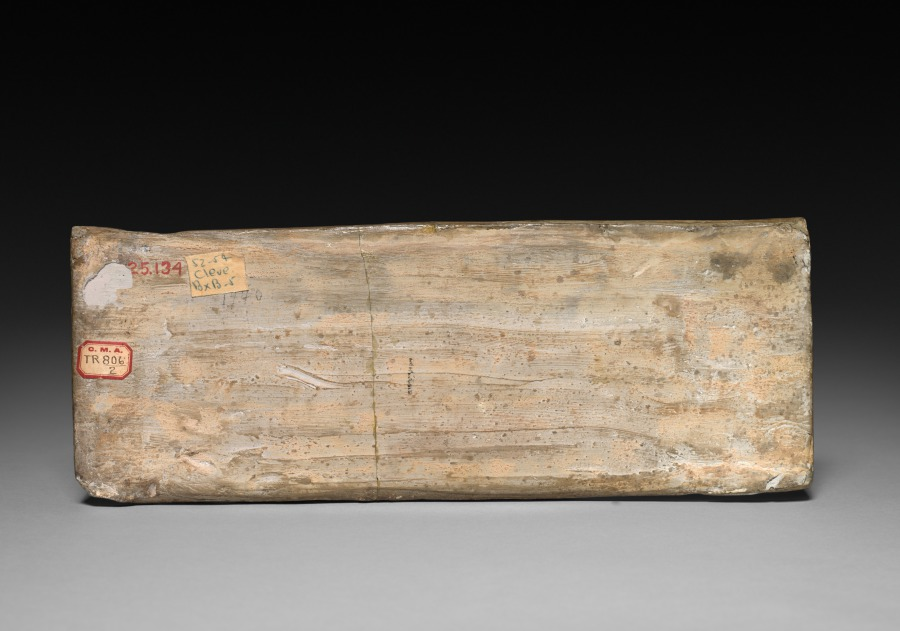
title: Panel from Model Cooking Stove: Fairy Feeding Lingzhi Fungus to a Dragon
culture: China, from a tomb in Xi'an, Shaanxi province, Western Han dynasty (206 BCE–8 CE)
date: 100–1 BCE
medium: earthenware with impressed relief decoration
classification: Ceramic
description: Han dynasty tombs were often furnished with grave goods to provide the deceased with items for the afterlife. This panel with a dragon was part of a miniature pottery stove to be placed in a burial chamber. This scene of a dragon being fed fungus by a winged fairy is molded on the panel. The dragon is an auspicious creature and an animal of the cardinal directions that protects the east.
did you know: Han dynasty tombs were often furnished with grave goods to provide the deceased with items for the afterlife.